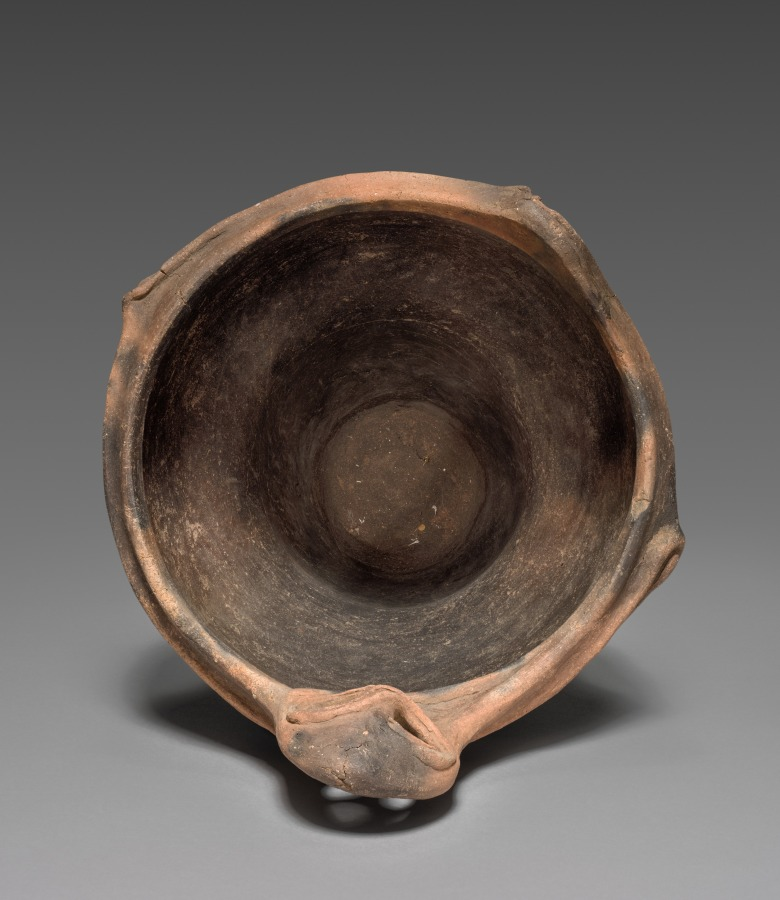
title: Cooking Vessel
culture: Japan, Jōmon period (c. 10,500–300 BCE)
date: c. 2500 BCE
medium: earthenware with impressed and applied designs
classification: Ceramic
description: This asymmetrical vessel has designs made by pressing cord or rope onto the damp clay and cylinders of clay applied to the surface. Based on its designs and shape, it was likely produced in the northern Kanto region. For reasons unknown today, different regions created signature styles.